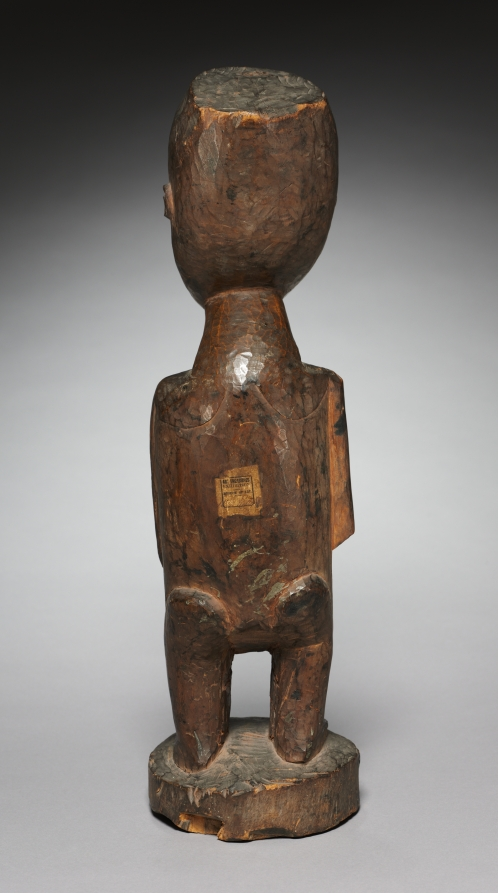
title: Male Figure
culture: Central Africa, Democratic Republic of the Congo, Kongo or Vili, early 19th century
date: early 1800s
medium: Wood, iron, and metalized glass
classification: Sculpture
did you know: This work has a paper label indicating it was exhibited in the 1857 Art Treasures of Great Britain in Manchester, England.